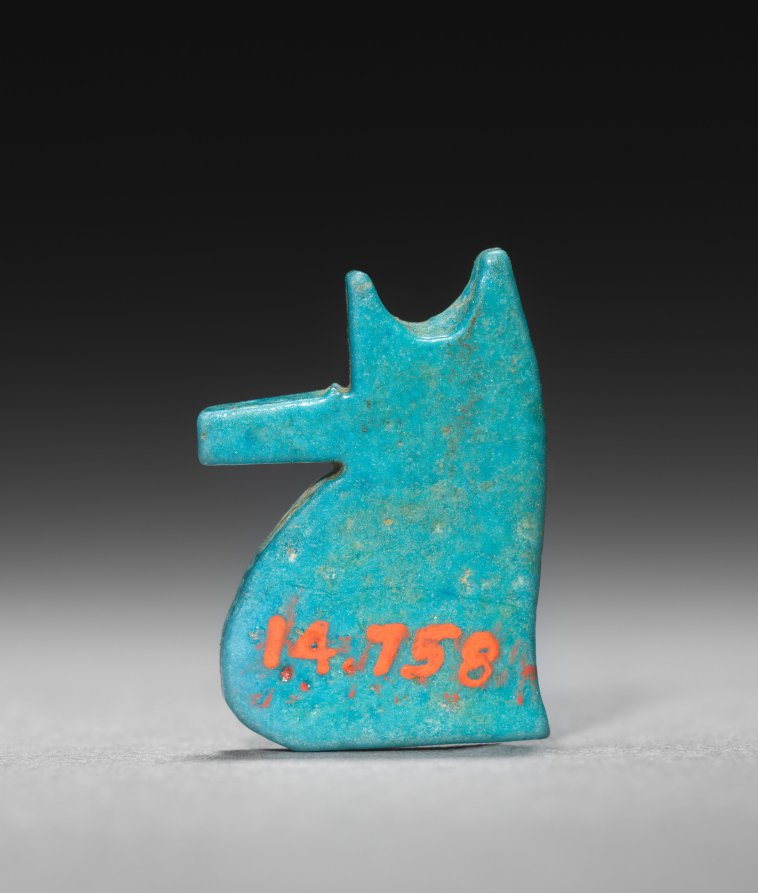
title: Eye of Horus Amulet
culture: Egypt, Third Intermediate (1069–715 BCE), Dynasties 22–25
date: 945–715 BCE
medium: turquoise faience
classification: Amulets